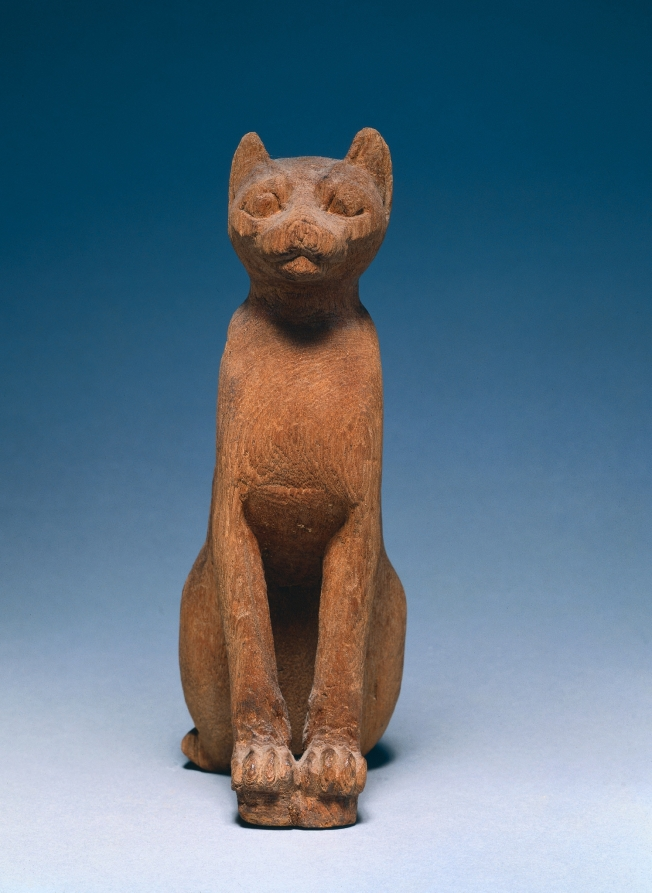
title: Cat Coffin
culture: Egypt, Late period (715–332 BCE), Dynasty 26–Greco-Roman period (332 BCE–395 CE), Ptolemaic dynasty (305–30 BCE)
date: 664–30 BCE OR 664–330 BCE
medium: Sycamore fig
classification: Funerary Equipment